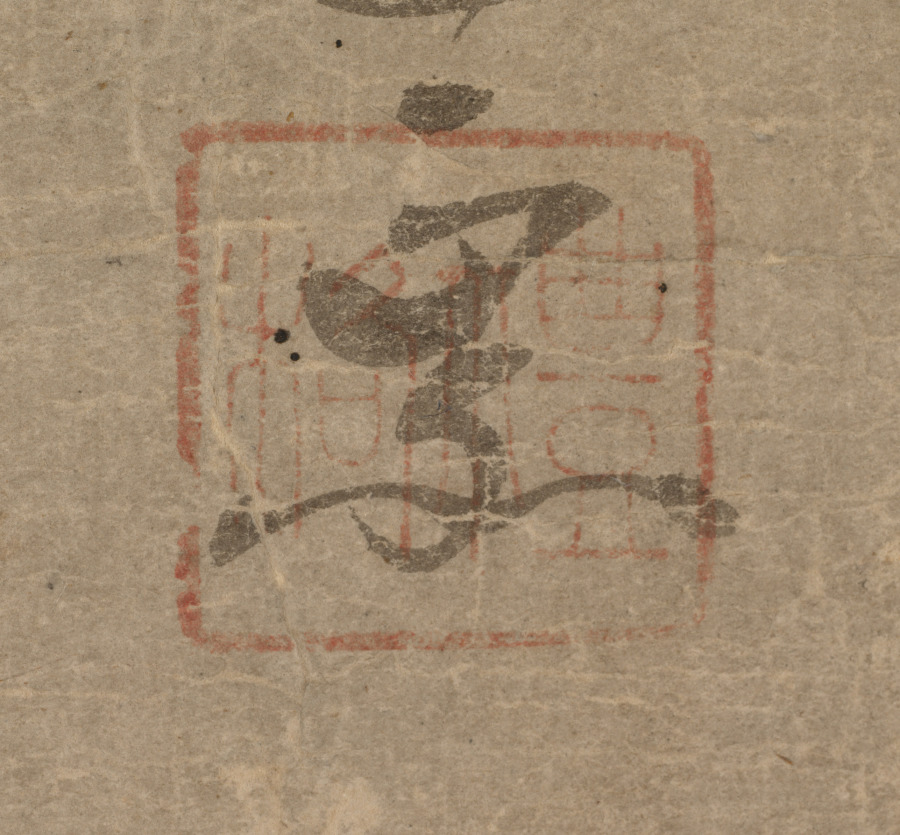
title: Sparrows and Bamboo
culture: Japan, Muromachi period (1392–1573)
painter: Shiken Saidō (Japanese, 1486–1581)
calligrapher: calligraphy by Ekkei Reikaku (Japanese, d. 1609)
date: mid- to late 1500s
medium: hanging scroll; ink on paper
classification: Painting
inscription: signed: Ekkei Reikaku daishi owaru inscription sealed: Reikaku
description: Shiken Saidō, whose style name was Ze'an, was a Zen monk who trained at Shōkokuji temple in Kyoto, and designed the garden of Reiun’in at Myōshinji temple. He painted landscapes in the style of painter and art advisor to the shogun, Sōami (died 1525), as well as bird-and-flower compositions. A poetic inscription by the monk Ekkei Reikaku accompanies this gentle composition of two sparrows perched on bamboo.